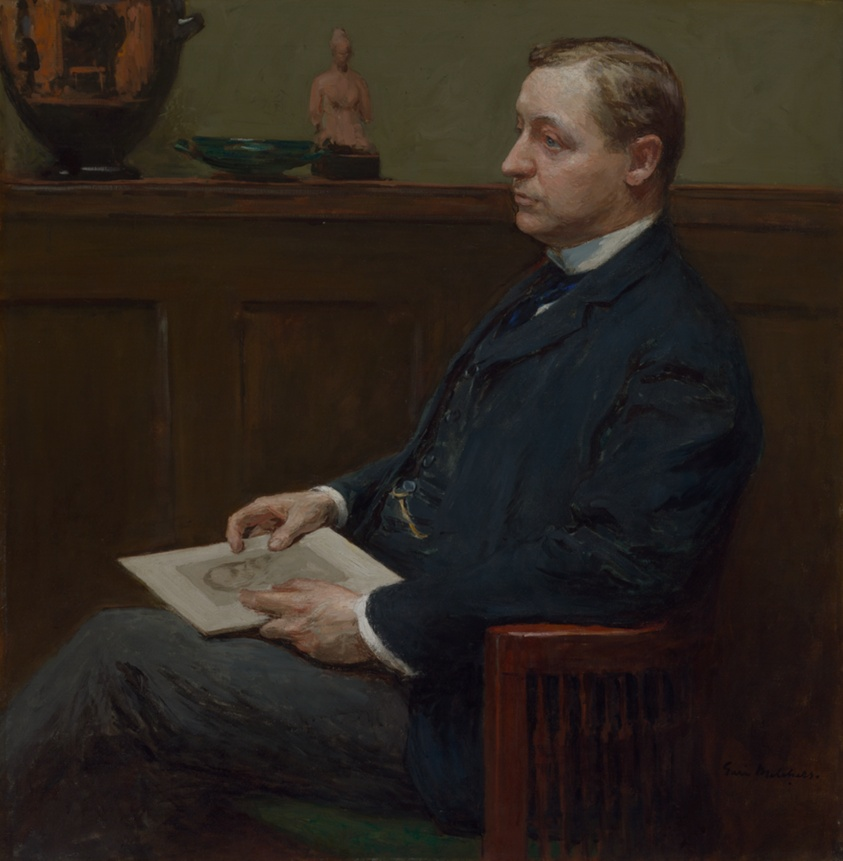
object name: Painting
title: Portrait of Charles Lawrence Hutchinson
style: Realism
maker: Julius Gari Melchers (American, 1860–1932)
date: c. 1902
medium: Oil on canvas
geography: United States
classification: painting; modern and contemporary art